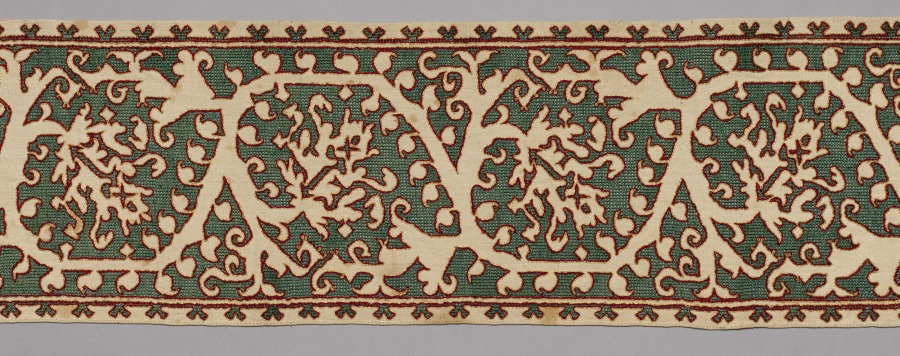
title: Embroidered Strip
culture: Italy, 17th century (copy of)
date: before 1916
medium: Linen: silk and gold filé, embroidery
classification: Embroidery